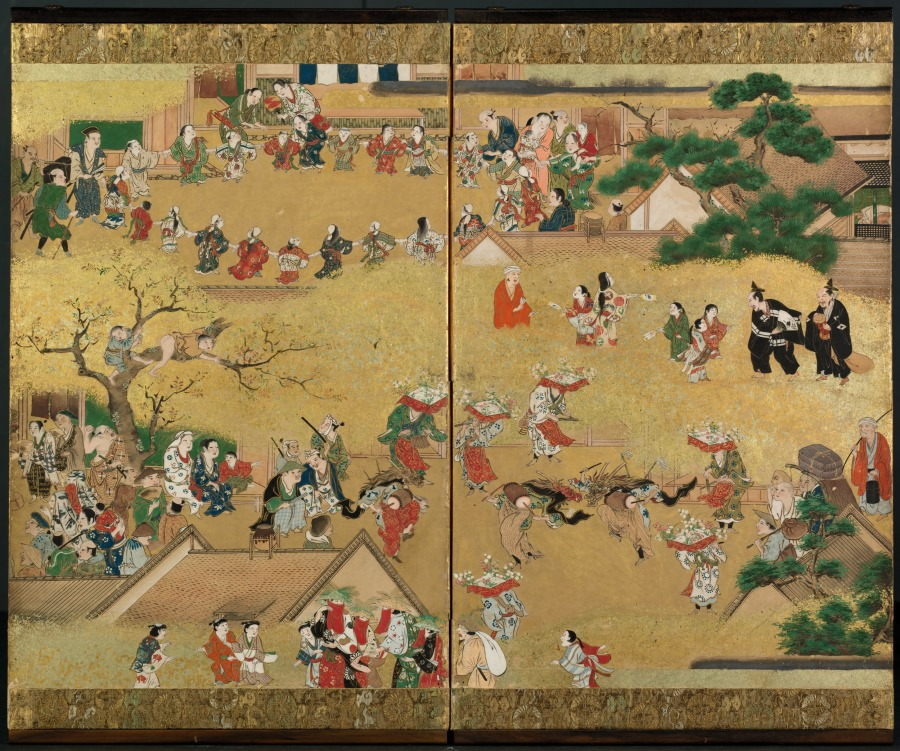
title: Festival Scenes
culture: Japan, Edo period (1615–1868)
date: 1600s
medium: One of a pair of six-panel folding screens; ink, color, gold, and gold leaf on paper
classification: Painting